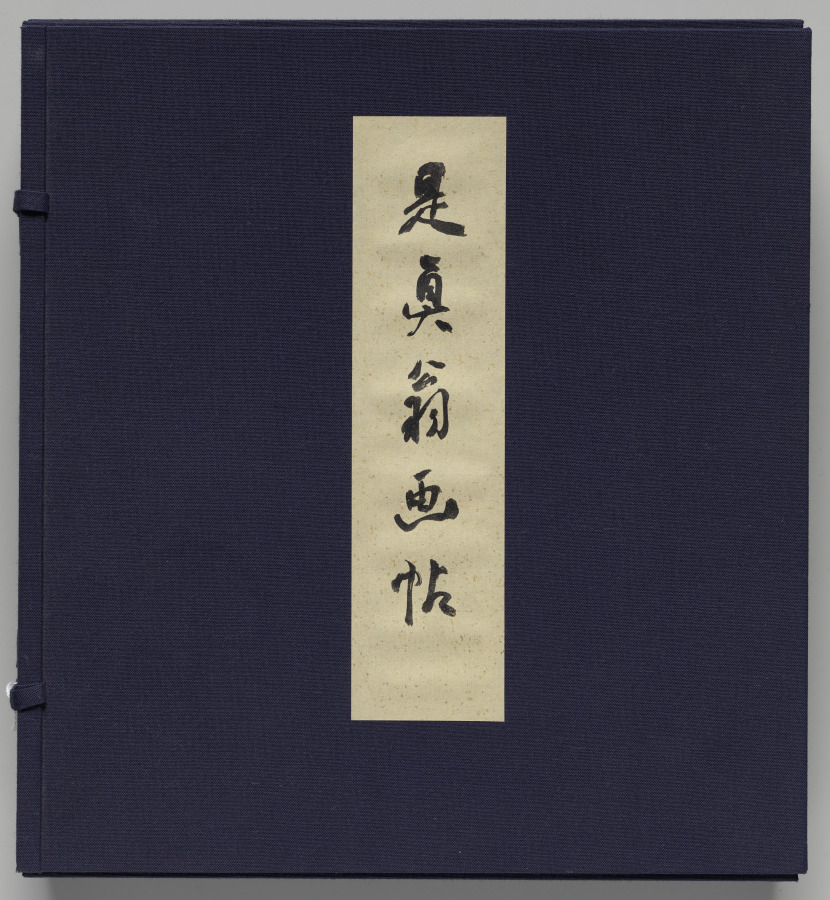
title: Album of Paintings by the Venerable Zeshin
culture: Japan, Edo period (1615–1868)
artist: Shibata Zeshin (Japanese, 1807–1891)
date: 1847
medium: accordion-style album of 12 leaves; ink, color, and gold on silk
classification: Bound Volume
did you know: Textile covers for albums help protect the works of art inside and add to their appeal--the title slip for this album has been left blank.